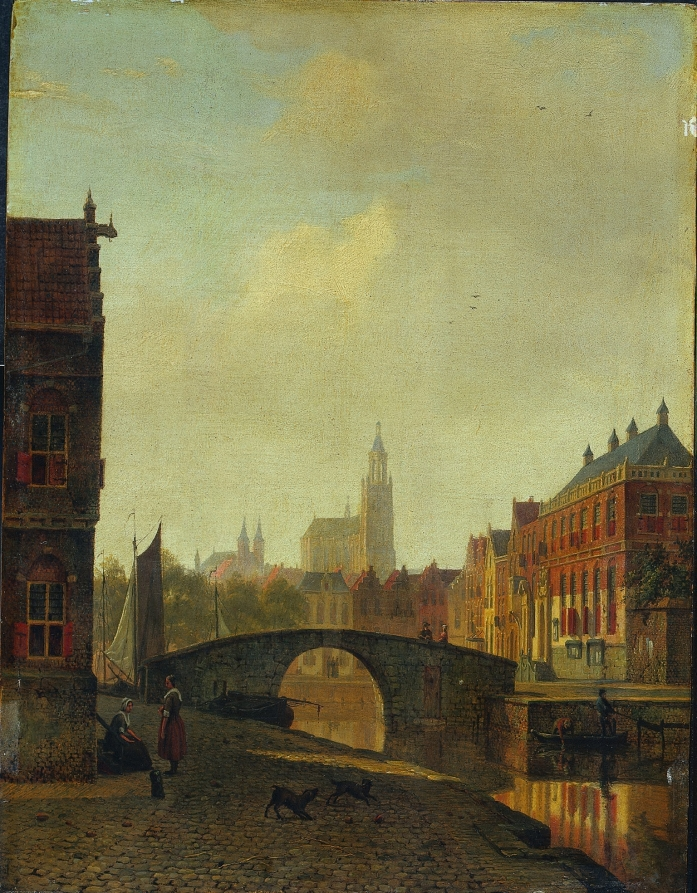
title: Imaginary View of Arnhem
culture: Netherlands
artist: George Andries Roth (Dutch, 1809–1887)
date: late 1830s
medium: oil on wood panel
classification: Painting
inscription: Signed lower right: g. a. roth. [written at an angle at the top of the cornerstones that form the edge of the quay in the lower right foreground]